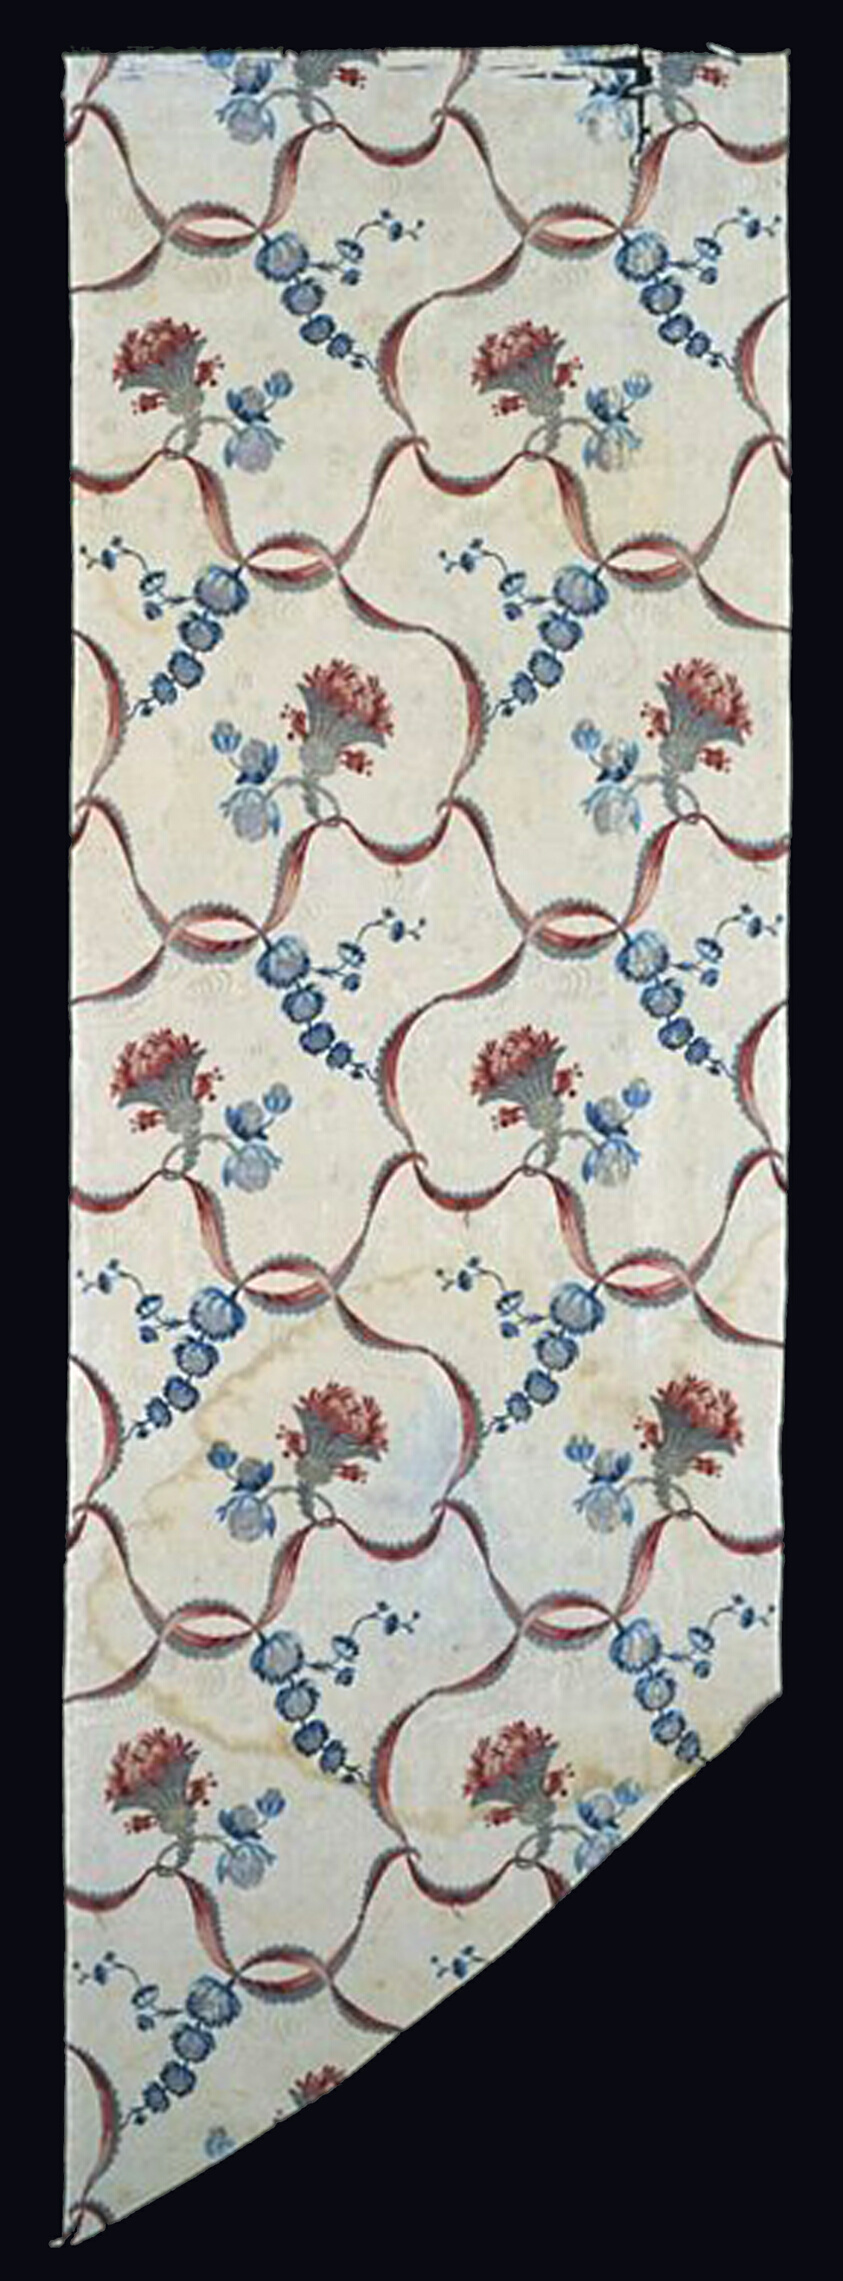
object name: Textile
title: Panel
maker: France, Lyon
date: 1725/75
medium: Silk, gold gilt strips, gild gilt strips wound around a silk fiber core, plain weave with supplementary patterning and brocading wefts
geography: Lyon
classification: textile; weaving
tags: garlands